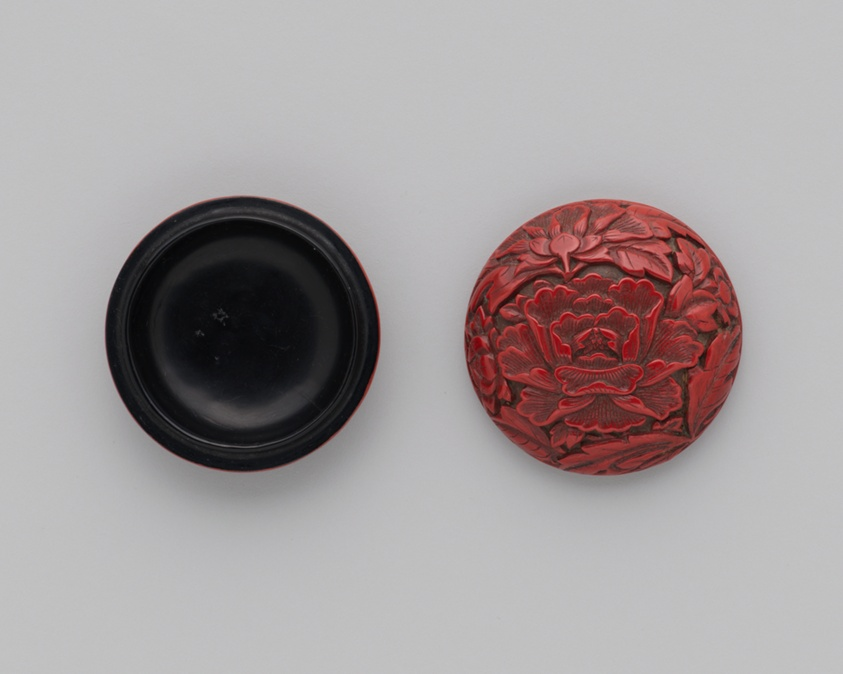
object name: Decorative Arts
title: Seal Paste Box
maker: China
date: Ming Dynasty (1368-1644), 15th century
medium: Carved lacquer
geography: China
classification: lacquer; seal